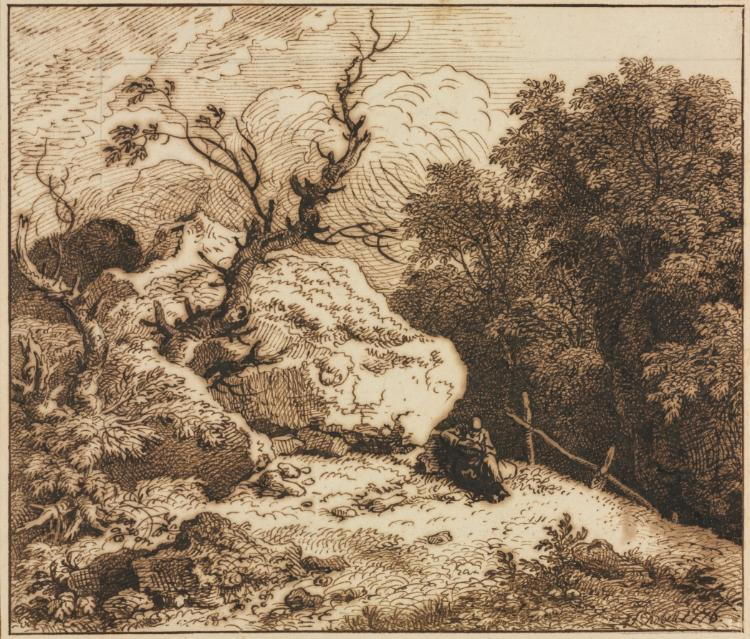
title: Hermit in a Wooded Landscape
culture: Germany, 18th century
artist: Ferdinand Kobell (German, 1740–1799)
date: 1776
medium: pen and brown ink over traces of graphite; framing lines brown ink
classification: Drawing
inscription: signed, lower right, in brown ink: Kobell 1776. ; SECONDARY SUPPORT, lower left, in graphite: 13 [circled] ; VERSO OF SECONDARY SUPPORT, lower left, in brown ink: ** ; lower right, in graphite: 718